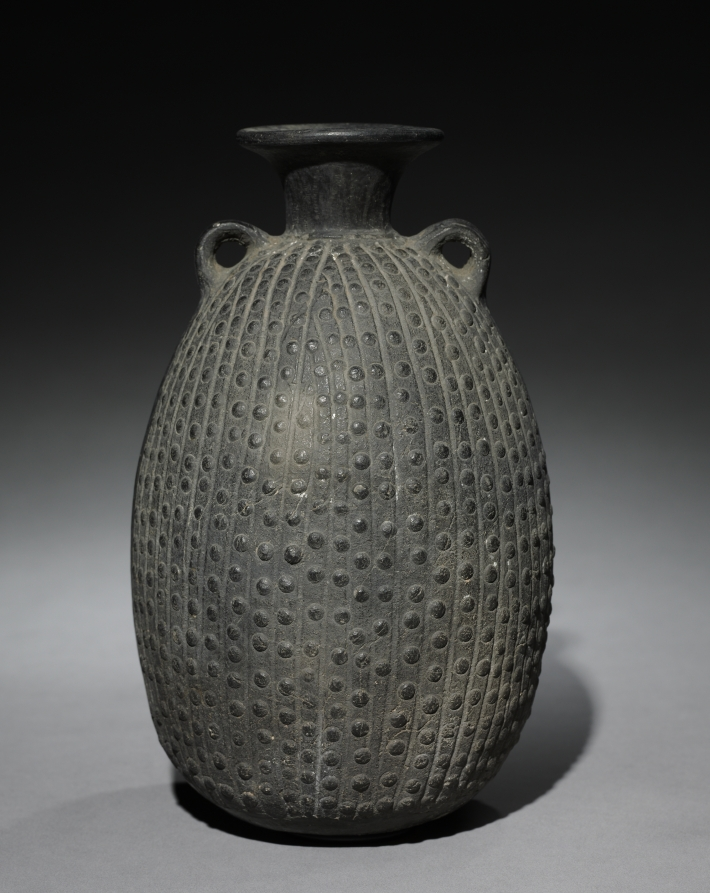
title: Darkware Vessel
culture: Peru, North Coast, Chimú style (900-1470)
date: late 1400s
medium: black ware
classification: Ceramic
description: Under the Chimú, whose empire stretched for 800 miles along the Peruvian north coast, the value of ceramics fell, perhaps because high-status vessels were made of precious metals. Accordingly, ceramics were mass-produced with molds and, rather than bearing painted scenes, often have an overall dark surface achieved by firing in a smoky atmosphere. This firing method was also used for very early Andean ceramics, including the example at the far left. We don't know whether the Chimú revived the method to venerate earlier cultures. The vessel with the stripped surface was made after the Chimú were conquered by the Inka in the late 1400s.